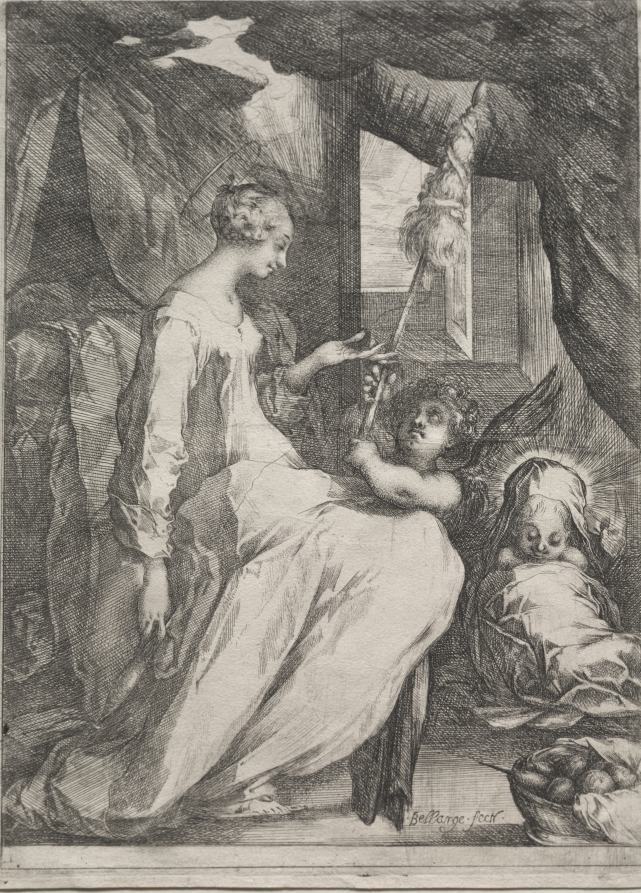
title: The Virgin and Child with Distaff and an Angel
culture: France, 17th century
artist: Jacques Bellange (French, c. 1575–1616)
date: c. 1611–13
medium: etching and engraving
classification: Print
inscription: lower right, in plate: · Bellange · fecit · ; VERSO, lower left, in graphite: 37V D139 ; lower right, in graphite: J. Bellange RD. 3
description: Bellange produced only 48 etchings between 1611 and 1616, yet his brilliant artistic imagination and technical mastery place him among the greatest European printmakers of the 17th century. Although based on traditional Christian imagery, Bellange’s etchings are filled with an unusual psychological drama and a penetrating spirituality. Elongated, sensual figures engage in provocative scenes that might seem extreme or even bizarre but are characteristic of Mannerism, an international artistic style at the time. Here, the Virgin Mary spins thread while the Christ child sleeps. The basket of wool and the distaff holding the wool as it is spun both relate to the legend that describes the Virgin’s upbringing at the Temple of Jerusalem, where she spun wool and wove vestments for the priests.